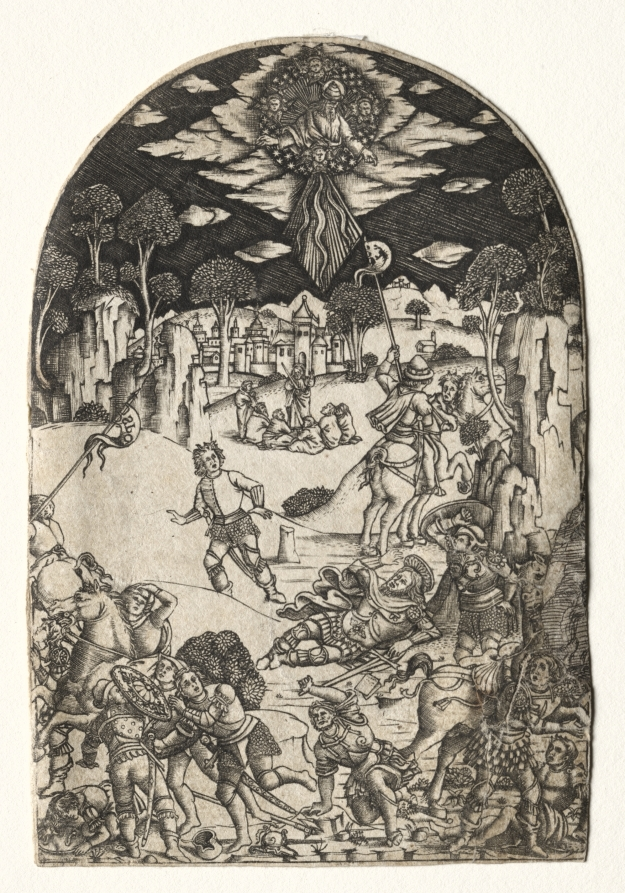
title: The Conversion of Saint Paul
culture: Italy, Siena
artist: Matteo di Giovanni (Italian, c. 1435–1495)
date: late 1400s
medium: engraving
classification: Print